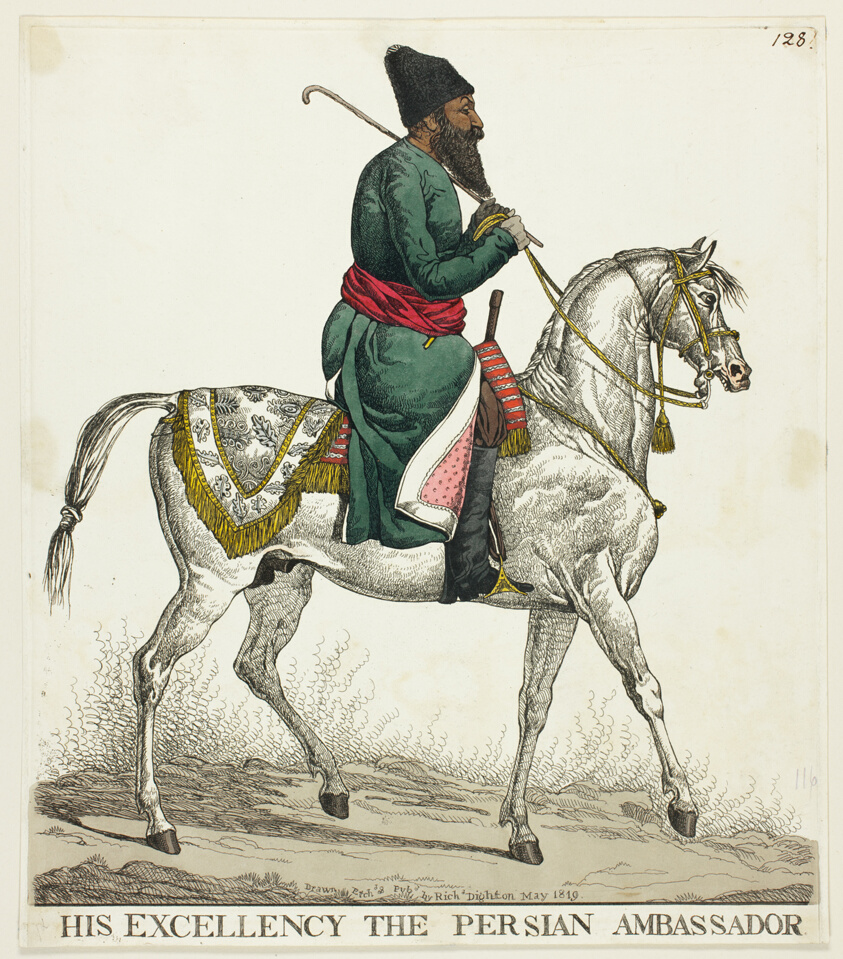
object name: Print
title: The Persian Ambassador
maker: Richard Dighton (English, 1795-1880)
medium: Etching on paper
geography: England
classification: etching; print; prints and drawing